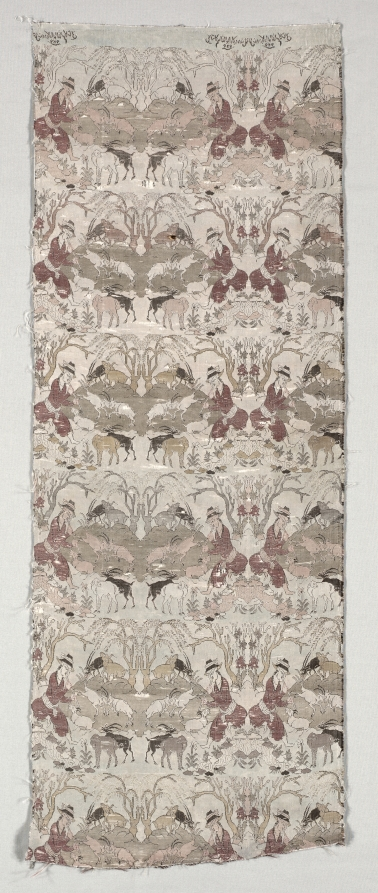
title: Silk Textile with Goatherds in a Landscape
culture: Iran, Isfahan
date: 1900s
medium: Silk: lampas weave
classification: Textile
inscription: inscription at top: "Work of the servant of the court, Abu al-Quasim Kashani, year 929."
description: This textile has a repeated design of goatherds piping to goats in a landscape setting. At the top is an inscription reading: “Work of the servant of the court, Abū al-Quāsim Kāshānī, year 929.” In the Muslim calendar 929 is equivalent to 1523, but this fabric was woven in the 1900s. This textile emulates examples from the Safavid period (1501–1722), regarded as a high point of Iranian culture. A lampas weave is characterized by the combination of two weave structures with two sets of wefts—the threads over and under which the warp threads are woven. Threads of the pattern weft are laid on top of the background weft to form the design. Lampas is typically woven in silk, sometimes with the addition of metallic thread.